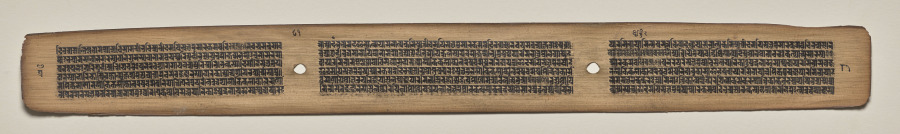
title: Text, Folio 81 (verso), from a Manuscript of the Perfection of Wisdom in Eight Thousand Lines (Ashtasahasrika Prajnaparamita-sutra)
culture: Eastern India, Bihar, Vikramashila Monastery. Painting: Nepal, Kathmandu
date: Sunday, September 14, 1119 (year 239 of the Newar Samvat in the month of Ashvina)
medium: gum tempera and ink on palm leaves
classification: Painting